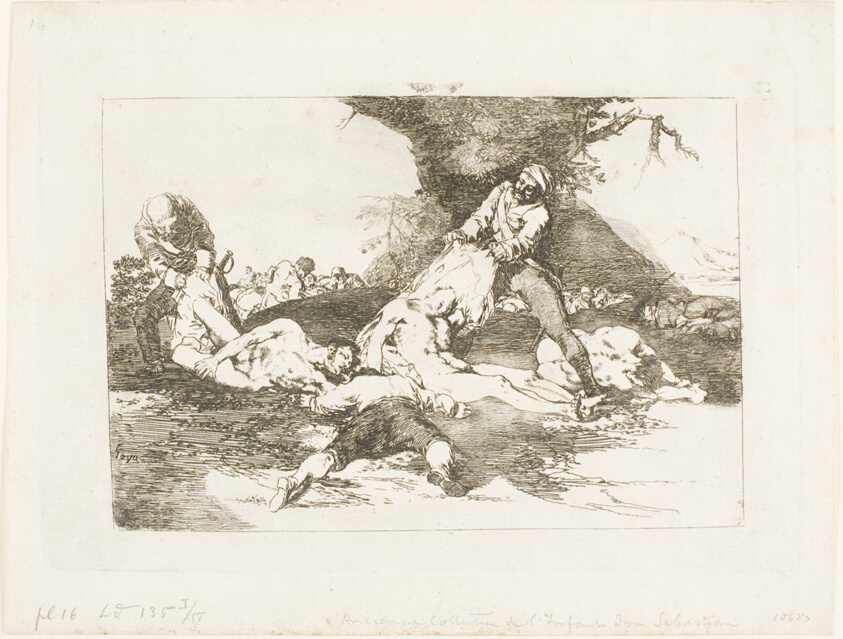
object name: Print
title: They Make Use of Them, plate 16 from The Disasters of War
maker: Francisco José de Goya y Lucientes (Spanish, 1746-1828)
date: 1810/12, published 1863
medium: Etching, lavis, drypoint, burin, and burnishing on ivory laid paper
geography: Spain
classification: etching; print; prints and drawing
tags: war